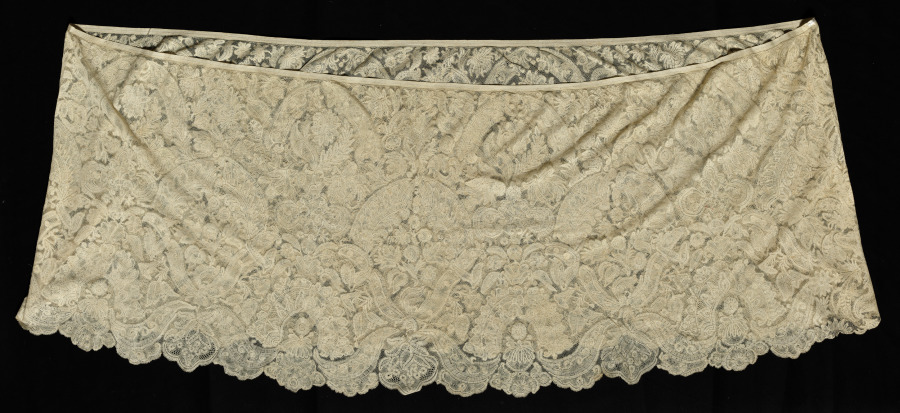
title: Lace Flounce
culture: Flanders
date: 1700s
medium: Bobbin lace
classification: Lace